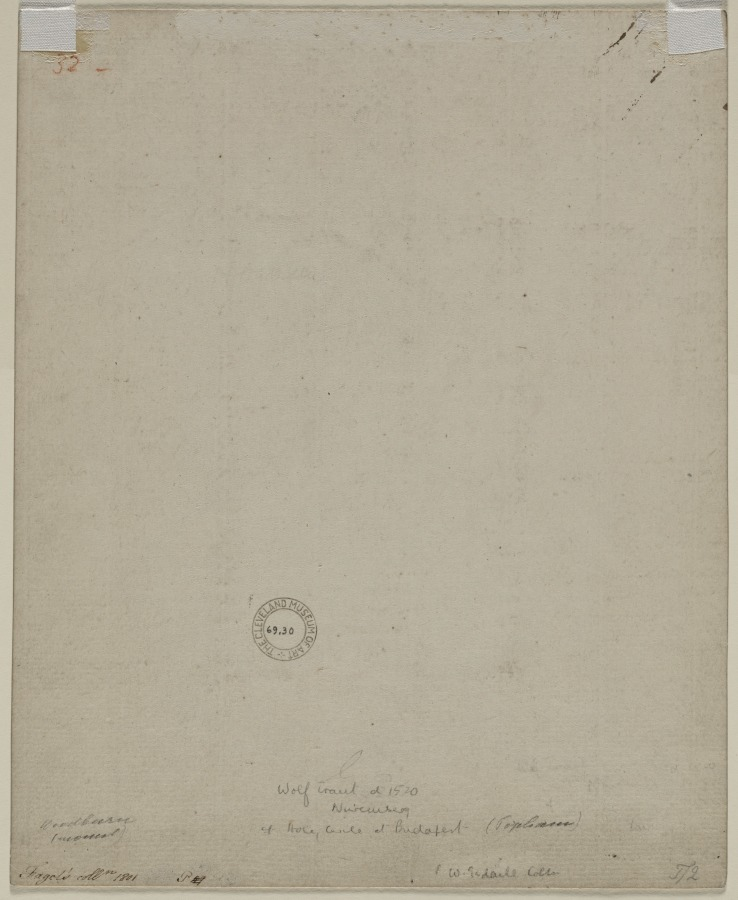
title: The Meeting of Joachim and Anna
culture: Germany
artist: Wolf Traut (German, c. 1486–1520)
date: first quarter 1500s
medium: pen and black ink and brush and gray wash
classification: Drawing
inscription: SECONDARY SUPPORT, upper left, in graphite: 1498 ; upper right, in brown ink: sig. ; lower center, in brown ink: Hans Holbein ; VERSO OF SECONDARY SUPPORT, lower left, in brown ink: Fagel's colln 1801 P 47[47 crossed out] ; upper left, in red chalk: 32 - ; lower center, in graphite: Wolf Traut d 1520 / Nuremberg / cf Holy c[illegible] at Budapest ; lower right, in graphite: (Popham) [parentheses part of inscription] ; lower left, in graphite: woodburn / (mount) [parentheses part of inscription] ; lower right, in graphite: W. Esdaile coll ; lower right, in graphite: T/2